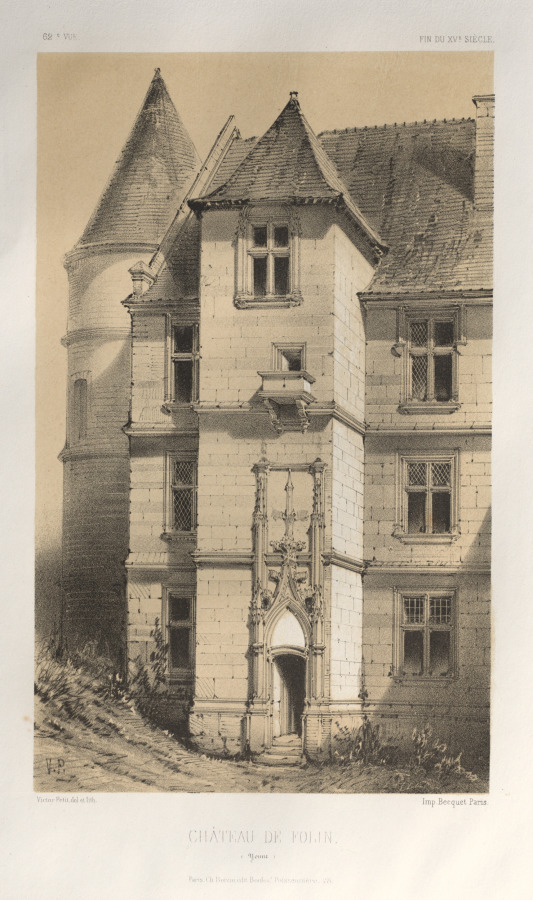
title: Architecture Pittoresque ou Monuments des XVeme. Et XVIeme. Siecles: Chateaux de France des XV et XVI Siecles: Pl. 62, Château De Folin (Yonne)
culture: France, 19th century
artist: Victor Petit (French, 1817–1874)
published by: Charles Boivin (publisher and editor); Lith de Godard a Paris (printer)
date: 1860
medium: lithograph with tint stone, from portfolio of 100 lithographs with tint stone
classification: Print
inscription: Engraved in plate, above image, upper left: 62e VUE.; engraved in plate, above image, right: FIN DU XVe SIÈCLE.; engraved in plate, below image, lower left: Victor Petit, del et lith.; engraved in plate, below image, lower right: Imp .Becquet Paris.; engraved in plate, below image, center: CHÂTEAU DE FOLIN. / (Yonne) / Paris. Ch. BOivin. édit. Boulevt. Poissonnières, 23.